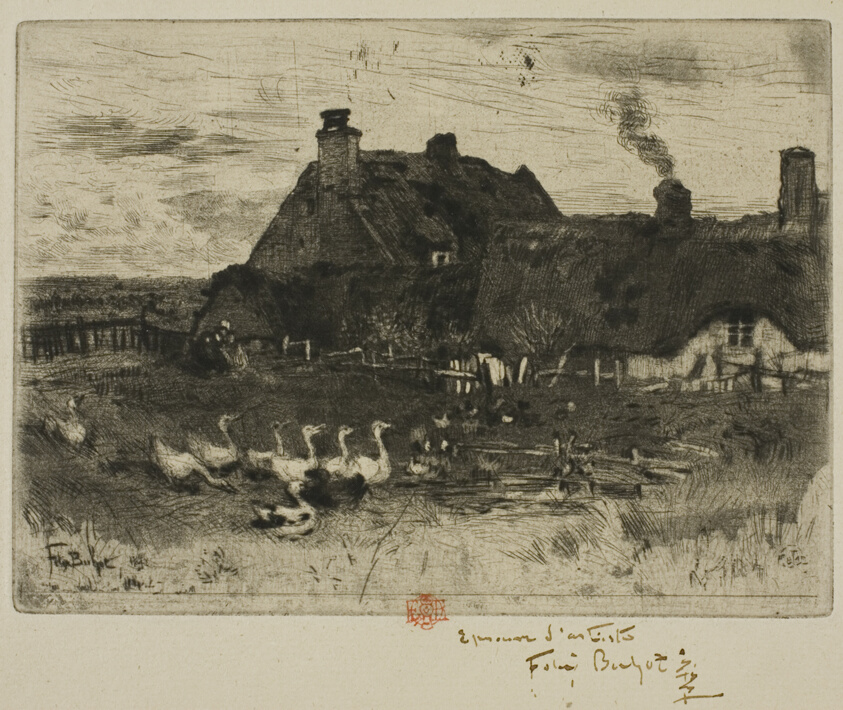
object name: Print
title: The Little Thatched Cottages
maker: Félix Hilaire Buhot (French, 1847-1898)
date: 1878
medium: Etching, drypoint and aquatint on ivory laid paper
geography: France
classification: etching; print; prints and drawing